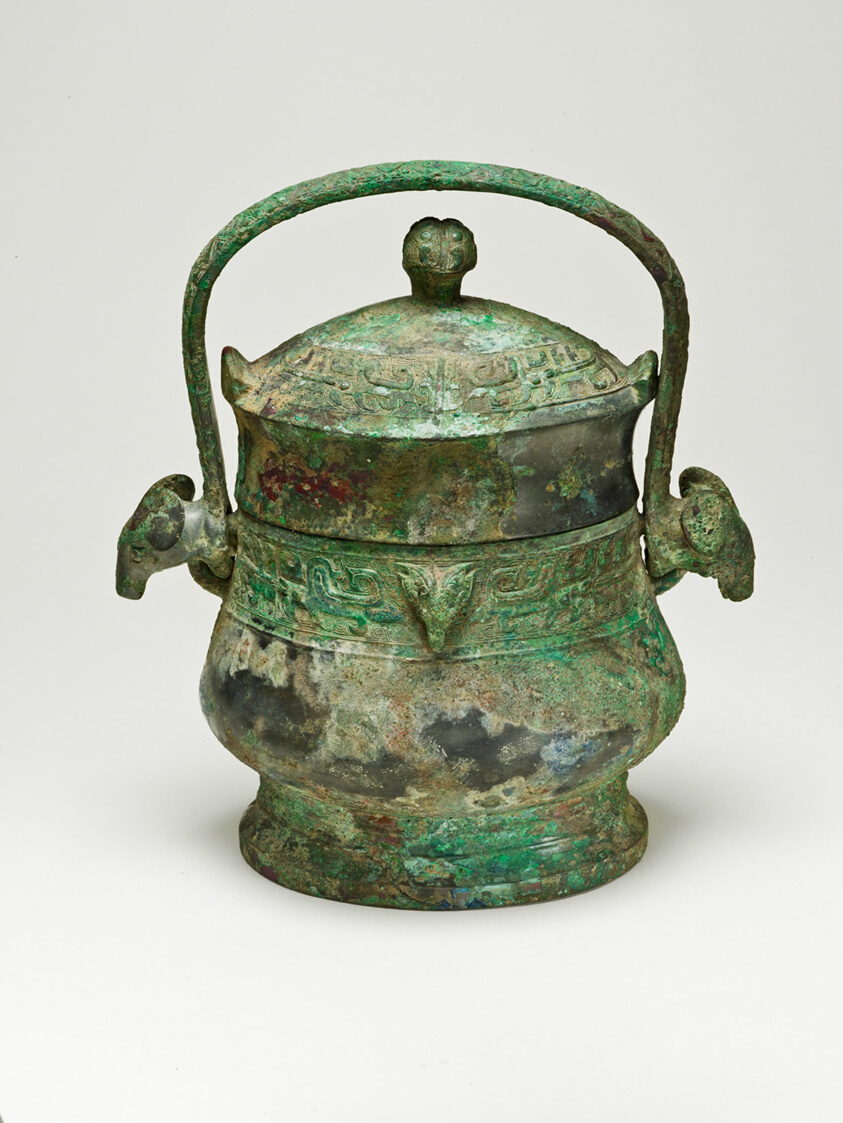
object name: Vessel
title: Bucket with Swing Handle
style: Chinese (culture or style)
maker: China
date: Western Zhou dynasty ( 1046–771 BC ), 1000/950 BCdd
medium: Bronze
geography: China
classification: vessel; bronze; vessel for serving drinks; metal; asian art